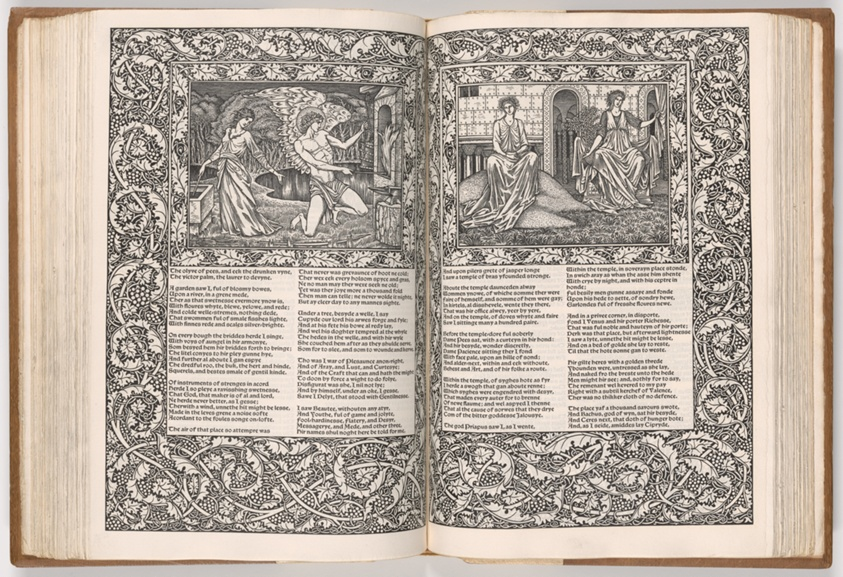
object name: Book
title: The Works of Geoffrey Chaucer Now Newly Imprinted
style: Arts and Crafts Movement, 19th century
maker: William Morris (English, 1834–1896); Illustrated by Sir Edward Burne-Jones (English, 1833-1898); Engraved by William Harcourt Hooper (English, 1834-1912)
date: 1896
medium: Hand-printed book on Batchelor linen paper, bound with tooled white pigskin on oak board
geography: England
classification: book; ink on paper